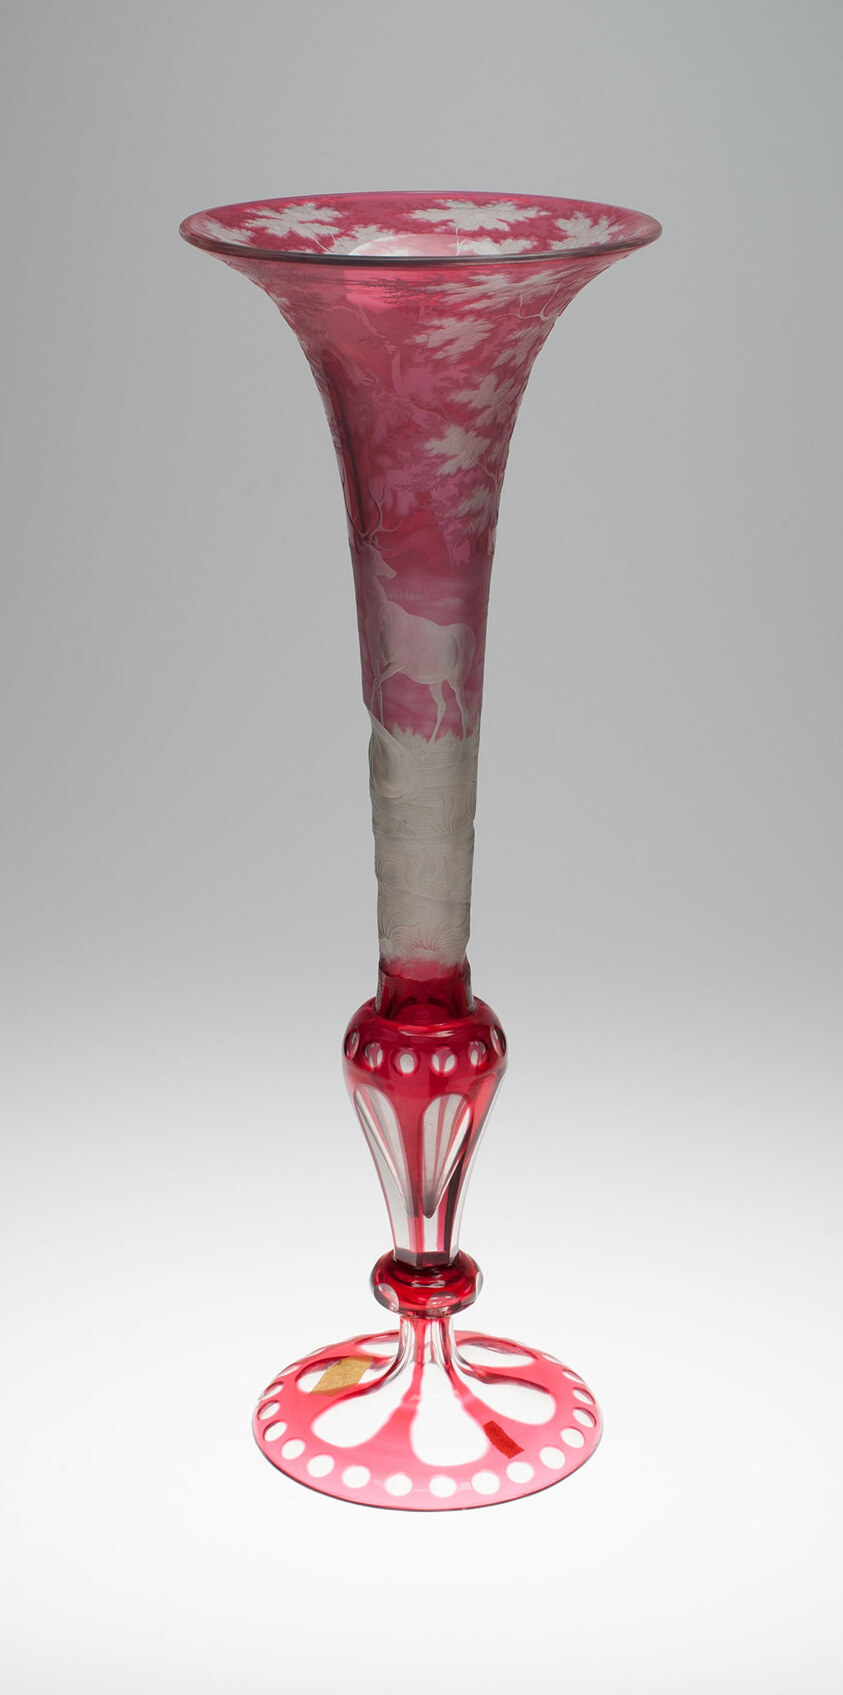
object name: Glass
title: Vase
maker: Bohemia, Czech Republic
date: c. 1850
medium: Glass; cut and stained red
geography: Bohemia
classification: vase; glass; vessel; european decorative arts